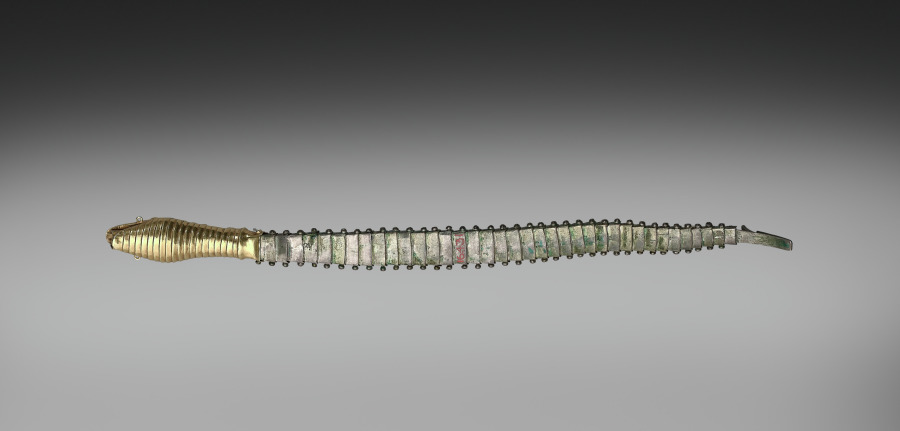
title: Bracelet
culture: Siam (?)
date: 1800s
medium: silver gilt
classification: Jewelry